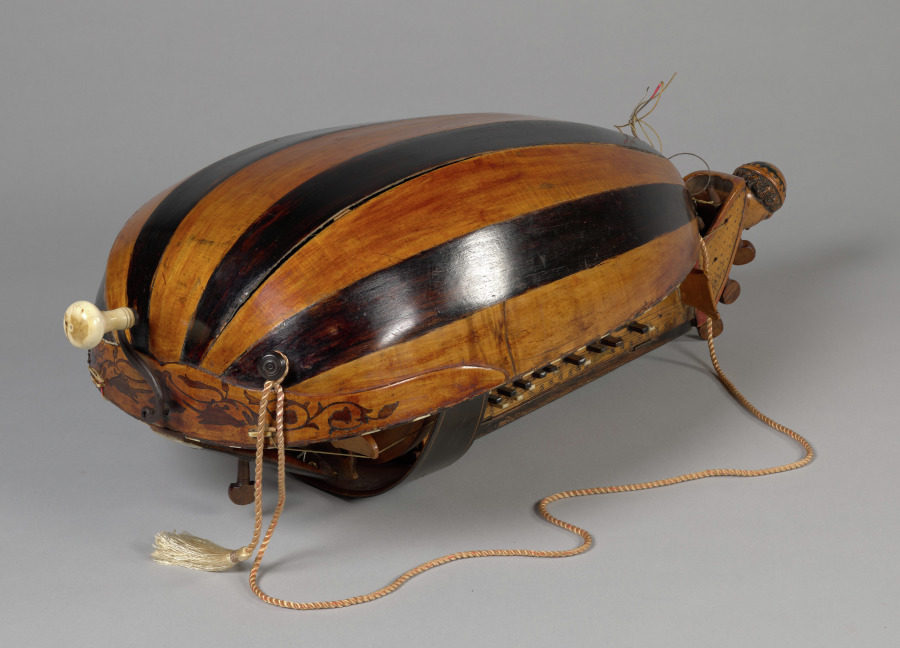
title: Vielle à Roue (Hurdy-Gurdy)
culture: France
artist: Jacques Decante (French, 1808–1884)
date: 1865–70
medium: Wood; mother-of-pearl inlay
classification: Musical Instrument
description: In France, the hurdy-gurdy is known as the vielle à roue (wheel fiddle). This six-stringed musical instrument produces sound by a hand crank-turned wheel that rubs against the strings. The wheel functions much like a violin bow, and single notes sound similar to those of a violin. Melodies are played on a keyboard that presses small wedges against the strings to change their pitch.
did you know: This vielle à roue was made in the French village of Jenzat, which was the manufacturing center for hurdy-gurdies during the 19th century.